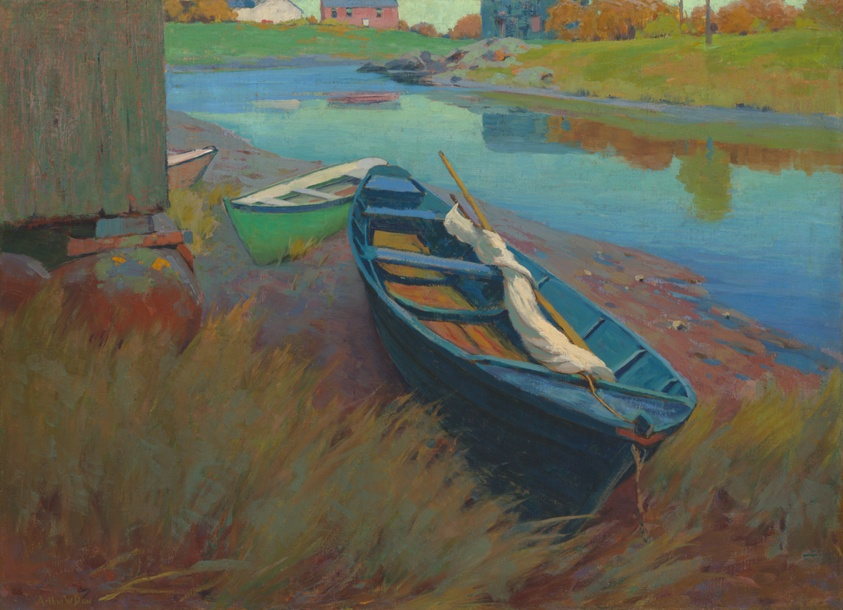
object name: Painting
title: Boats at Rest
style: Impressionism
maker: Arthur Wesley Dow (American, 1857–1922)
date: c. 1895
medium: Oil on canvas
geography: Ipswich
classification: painting; american arts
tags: landscapes, weather/seasons, water